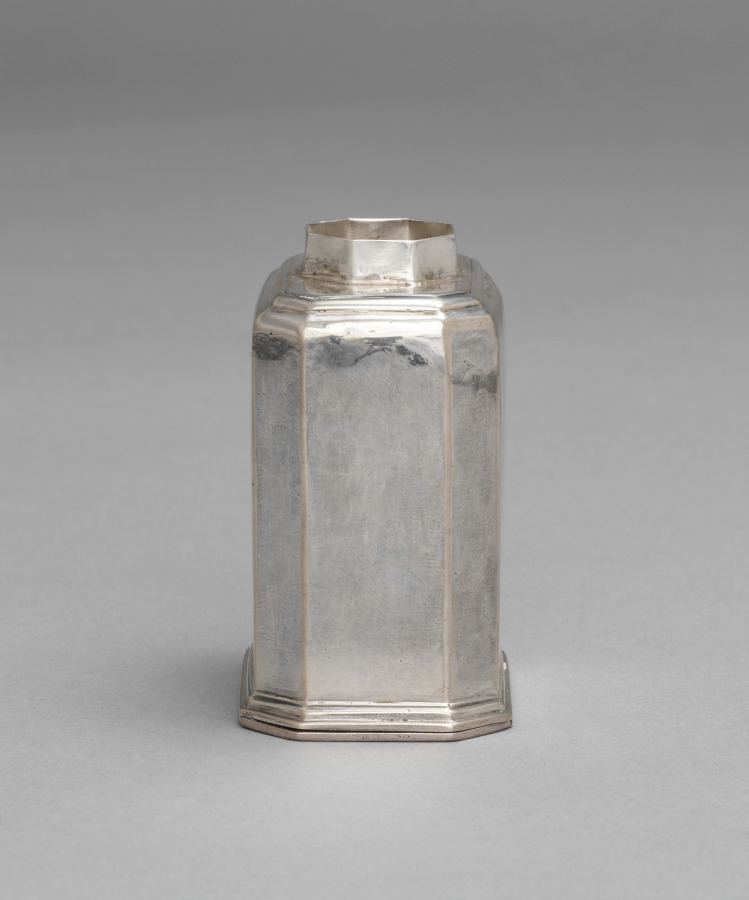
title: Tea Caddy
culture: England, London, 18th century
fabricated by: Thomas Ash (British)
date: 1713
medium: silver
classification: Silver